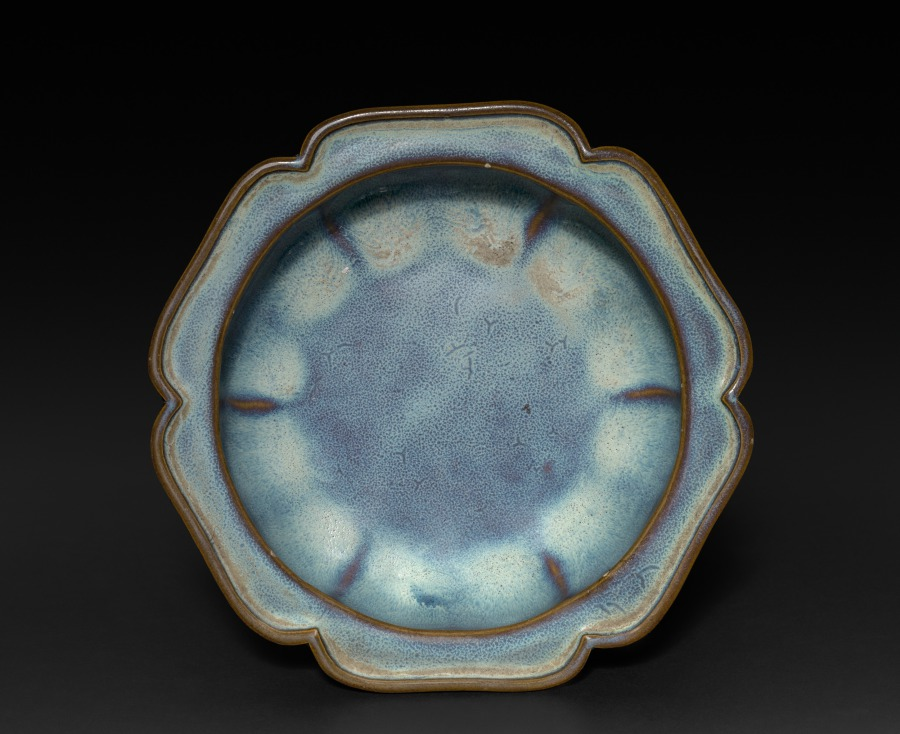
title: Flower Pot Stand or Bulb Bowl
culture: China, possibly Henan province, Yuan dynasty (1271-1368) - Ming dynasty (1368-1644)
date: 1300s–1400s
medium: glazed gray stoneware, Jun ware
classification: Ceramic